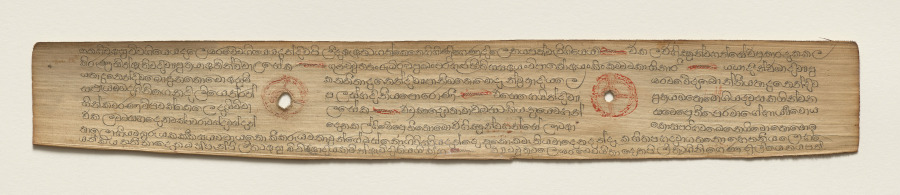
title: Leaf from a Buddhist Manuscript (verso)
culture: Sri Lanka, Singhalese, Late 17th century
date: c. 1700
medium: fiber paper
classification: Manuscript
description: Palm leaf material is still used for manuscripts in Sri Lanka. The palm leaves are prepared first by boiling them, drying them in the sun, and then rubbing them with oils. Scribes then use a metal stylus to incise the text. Then charcoal powder is wiped across the pages, filling in only the inscribed lines.